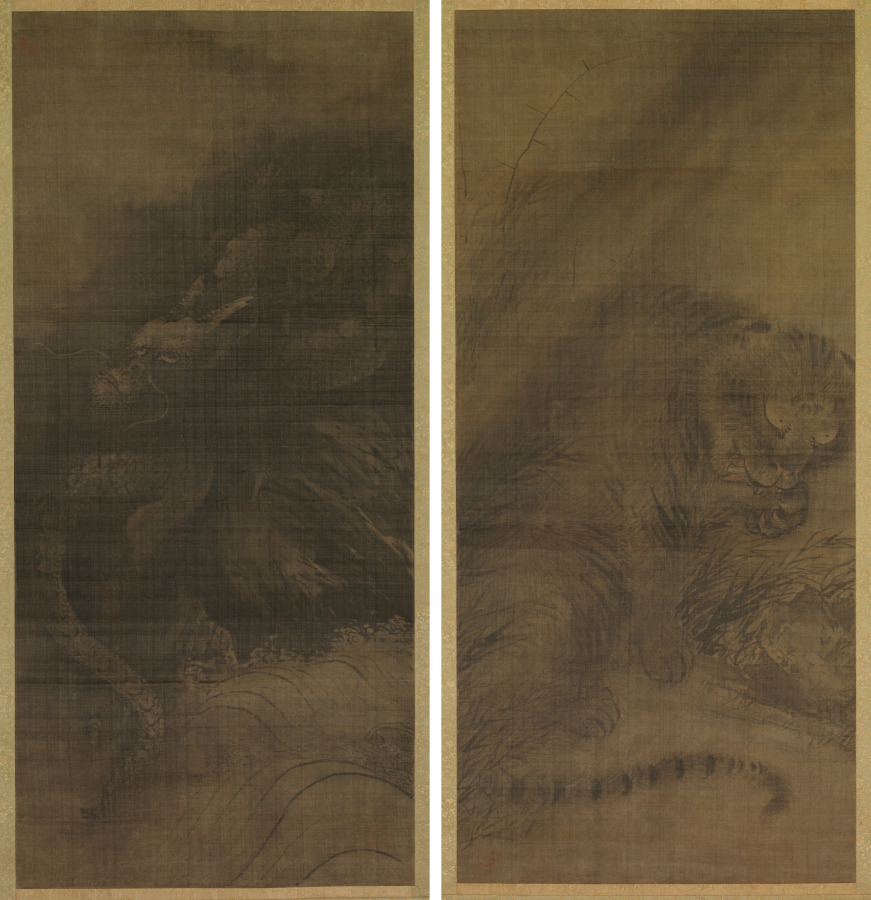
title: Dragon; Tiger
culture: China, Southern Song dynasty (1127-1279)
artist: Fachang Muqi (Chinese, 1220–1280)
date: c. 1250–79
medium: Pair of hanging scrolls; ink on silk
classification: Painting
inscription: 道有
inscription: 雜華室印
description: The dragon and tiger are tied to the philosophical concept of yin and yang, which describes opposite but complementary forces. The dragon occupies a tiered background of waves and mist. Its luminous head emerges from the darker passages, and its narrow twisting body is serpent-like. By contrast, the close-up view of the tiger emphasizes its bulk. The tiger bends its head to lick its paw while its tail curls in the foreground. In their original Chan Buddhist context, this pair of scrolls likely flanked a central image, like the Bodhisattva Guanyin. The silk has darkened over the centuries, and the slight reddish shading in the tiger’s tongue and nose has faded.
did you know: Fachang Muqi's ink paintings on Chan (or Zen in Japanese) themes were very popular in Japan.